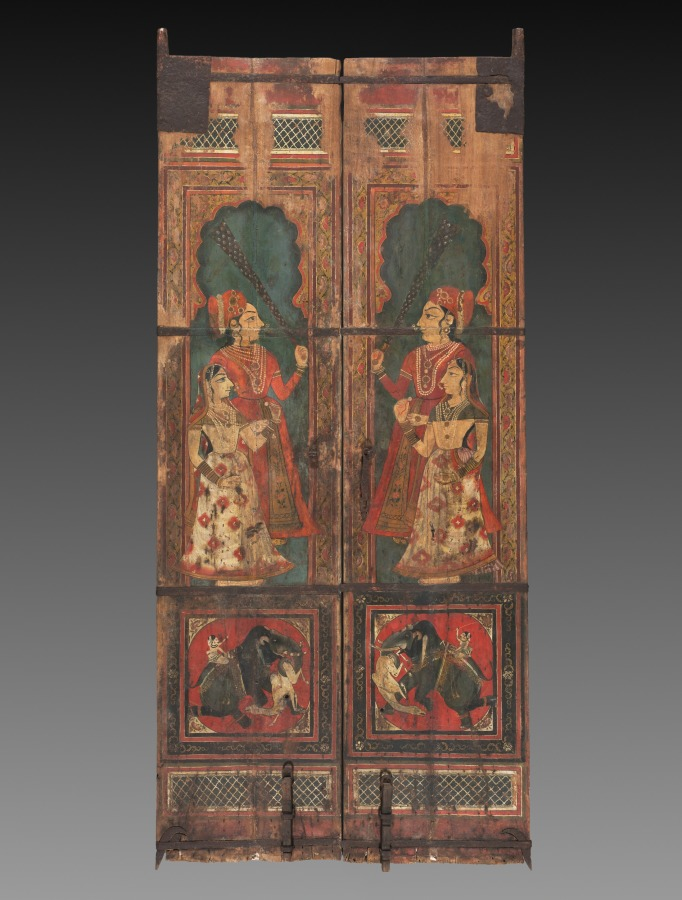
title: Pair of Painted Doors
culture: India, Bundi, 19th century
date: c. 1820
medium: color on wood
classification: Painting